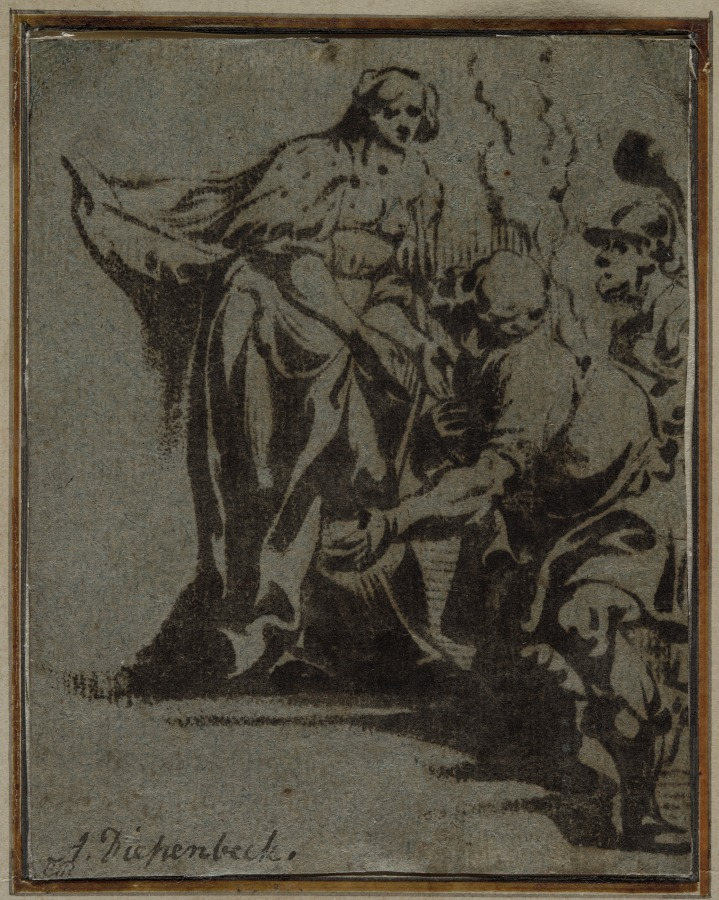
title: A Scene from Classical Mythology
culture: Belgium, 17th century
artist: Anthonis Sallaert (Flemish, c. 1590–1658)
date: 1600s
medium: monotype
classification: Print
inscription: bottom left, in brown ink: A. Diepenbeck; additional inscriptions on mounts Sotheby's sale 1799